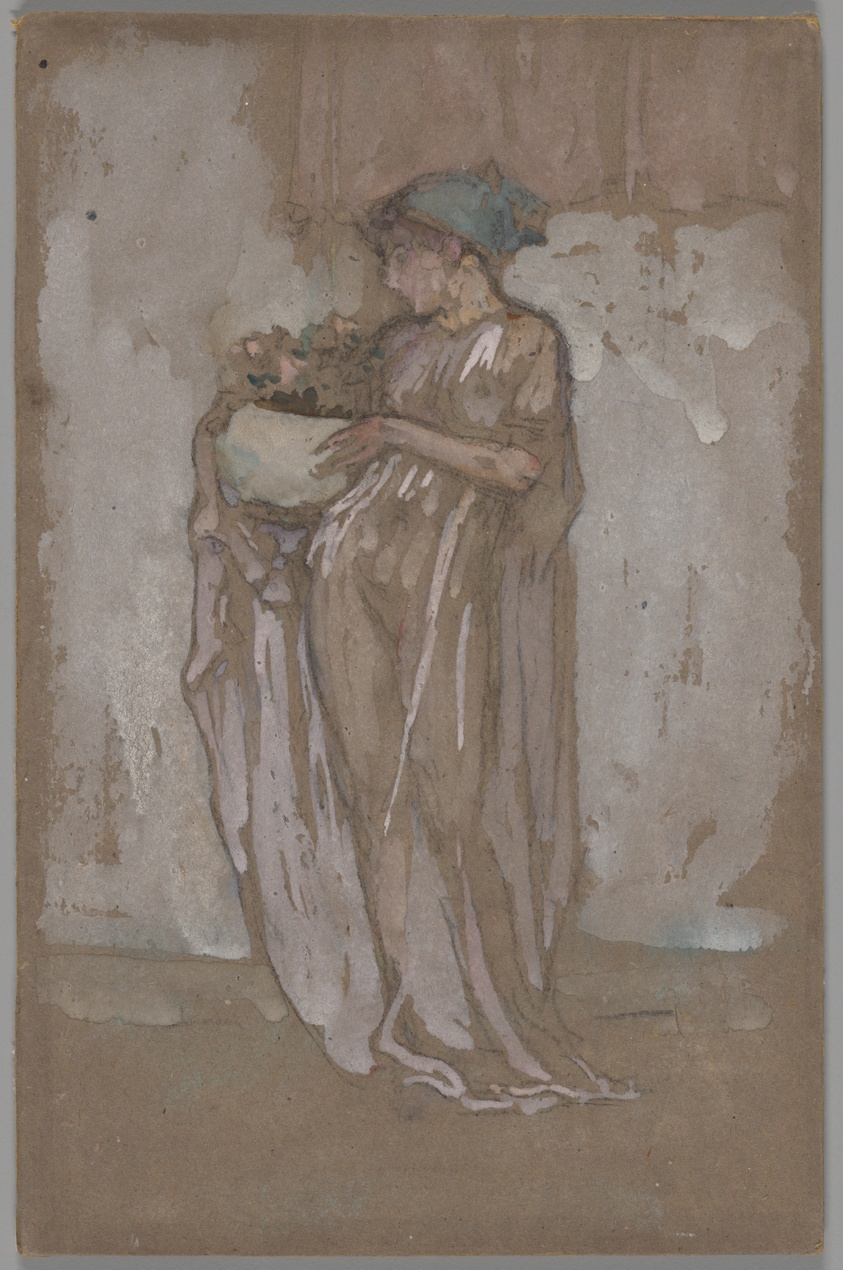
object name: Drawing and Watercolor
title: The Little Blue Cap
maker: James McNeill Whistler (American, 1834-1903)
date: 1893/95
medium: Watercolor and opaque watercolor over charcoal on brown wove paper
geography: United States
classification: watercolor; drawings (visual works); prints and drawing; paper